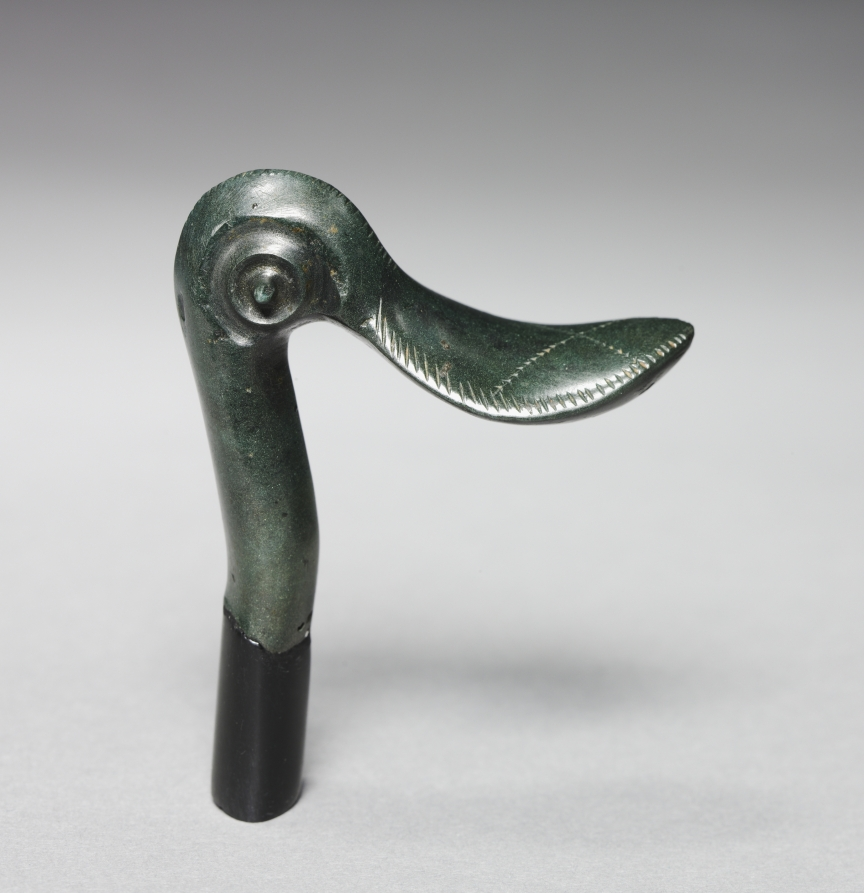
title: Duck Head Finial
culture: possibly Hungary, Bronze Age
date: c. 1400–1300 BCE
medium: bronze, cast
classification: Sculpture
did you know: A decorative object, this duck head finial likely topped a piece of furniture.